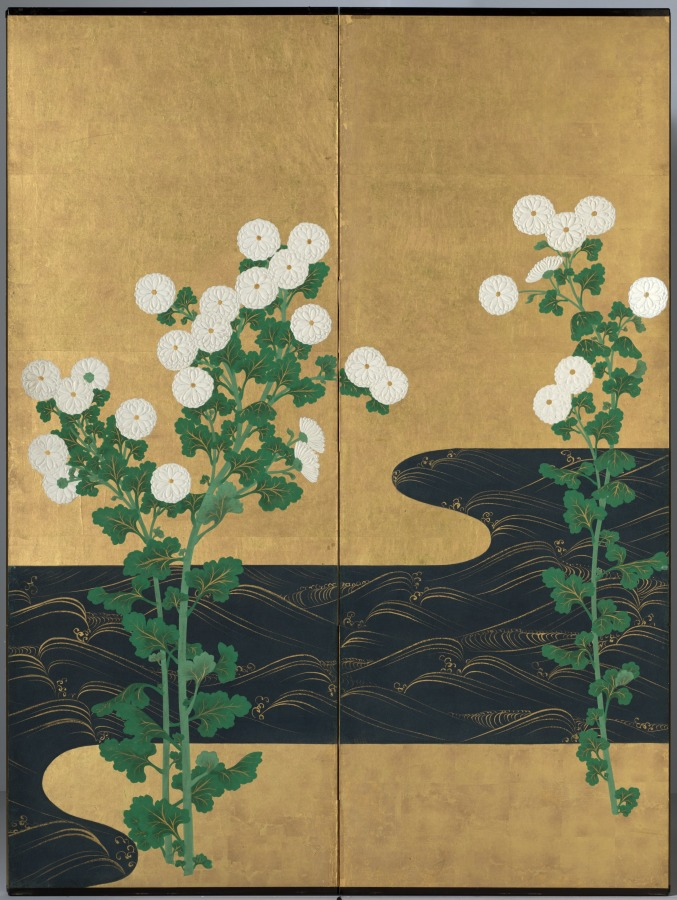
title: Chrysanthemums by a Stream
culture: Japan, Edo period (1615–1868)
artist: possibly by Ogata Kōrin (Japanese, 1658–1716)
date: c. 1715–30 or later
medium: One of a pair of six-panel folding screens; ink and color on gilded paper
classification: Painting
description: These screens recall a painting style so closely identified with Ogata Kōrin (1658–1716) that it is called Rinpa, or “Rin School,” after the ideograph “rin” in his name. The highly stylized background accentuates floral groupings that have been groomed so as to appear utterly artificial, like the synthetic arrangements available today. Kōrin's genius derived in large measure from natural phenomena painstakingly observed and then manipulated to create compositions of startling refinement and sparkling isolation. This process may have grown out of Kōrin's early immersion in the family textile business, a medium that encourages such dramatic distillations of form: the stream's gold-crested waves bring to mind traditional kimono robe designs of Kōrin's era. Works with the signature seen on this painting, including a style name, or persona suggested to Kōrin by his brother Kenzan (1663–1743), are sometimes considered to have been produced either in the last year of his life, when he was very ill, or after his death. In both scenarios, the lion’s share of the work would have been done by studio assistants, but little is truly known of his studio practice. Given the regularity of the gold waves on the stream, and the tension in the arrangement of the chrysanthemums, it is also possible that the screens were made in emulation of Kōrin's designs by a later artist.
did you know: The signature used on these screens may indicate paintings made in the last year of the artist's life, or works completed by his studio after his death.